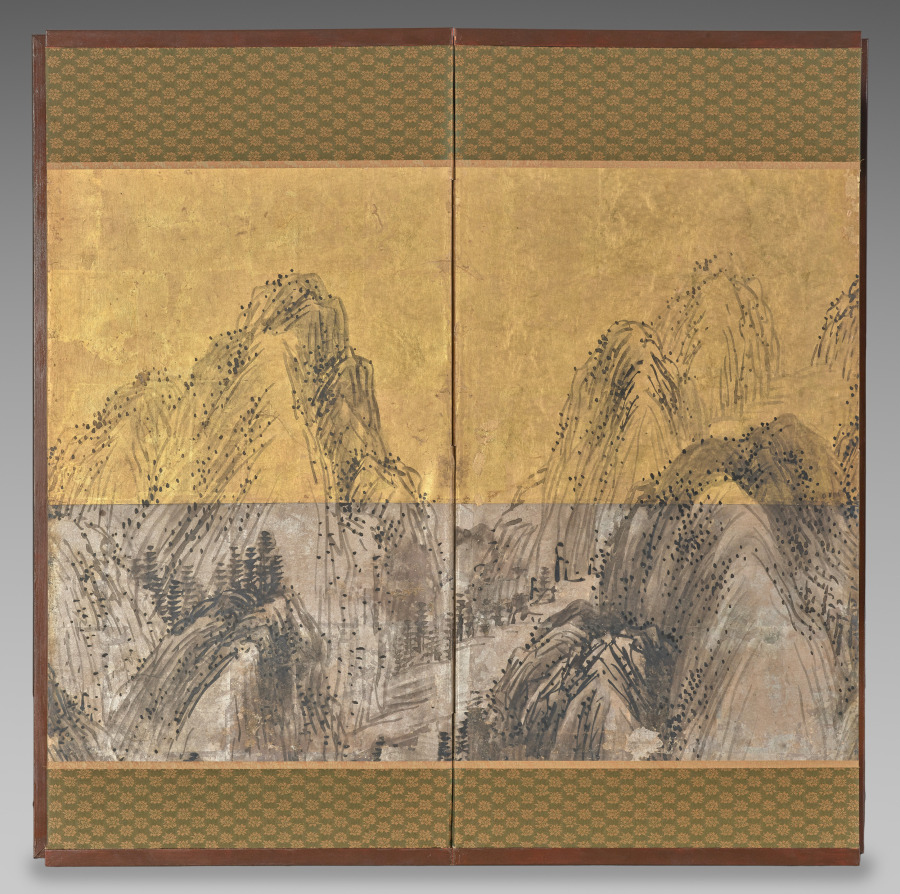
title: Seventy-Two Peaks Under the Blue Sky with Mount Furong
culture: Japan, Edo period (1615–1868)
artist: Matsumura Goshun (Japanese, 1752–1811)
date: 1785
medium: Eight-panel folding screen; ink with gold and silver foil on paper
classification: Painting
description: The low height of this folding screen suggests its use as a partition in a small tearoom. An inscription identifies the scene as the 72-peak Heng mountain range in Hunan, China, associated with Buddhist and Daoist traditions and celebrated in poetry. Special mention in the inscription is made of Mount Furong, one of the peaks in the range. Matsumura Goshun may have drawn inspiration from his teacher, Yosa Buson (与謝蕪村) (1716–1783), whose final work depicted the same mountain range.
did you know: By painting on silver and gold foil, Matsumura Goshun created an alluring surface and deep space in this surprisingly spare vista.